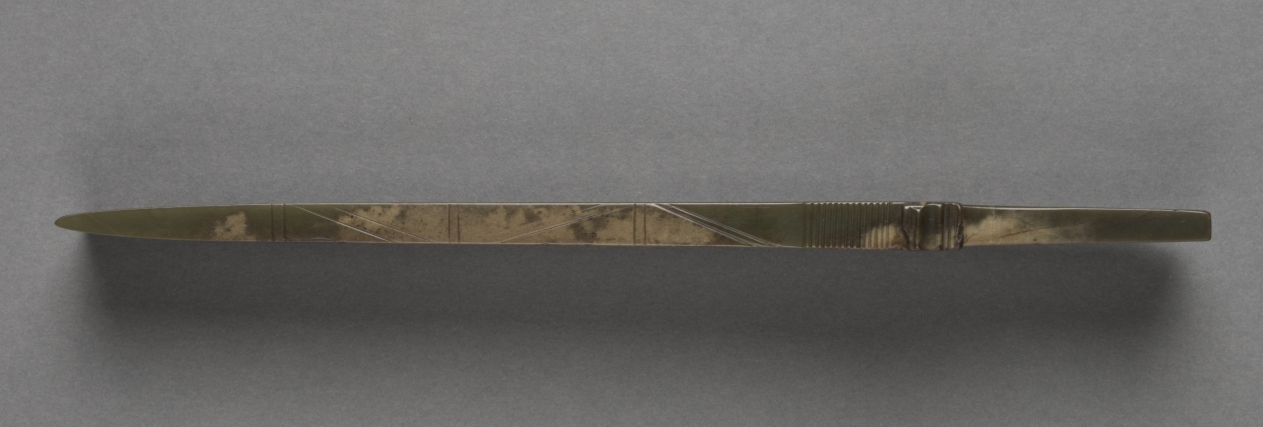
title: Ge (Dagger Axe)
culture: China, Neolithic period (3000s–2000s BCE) to Shang dynasty (c. 1766–1045 BCE)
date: c. 2500–1500 BCE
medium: nephrite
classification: Jade